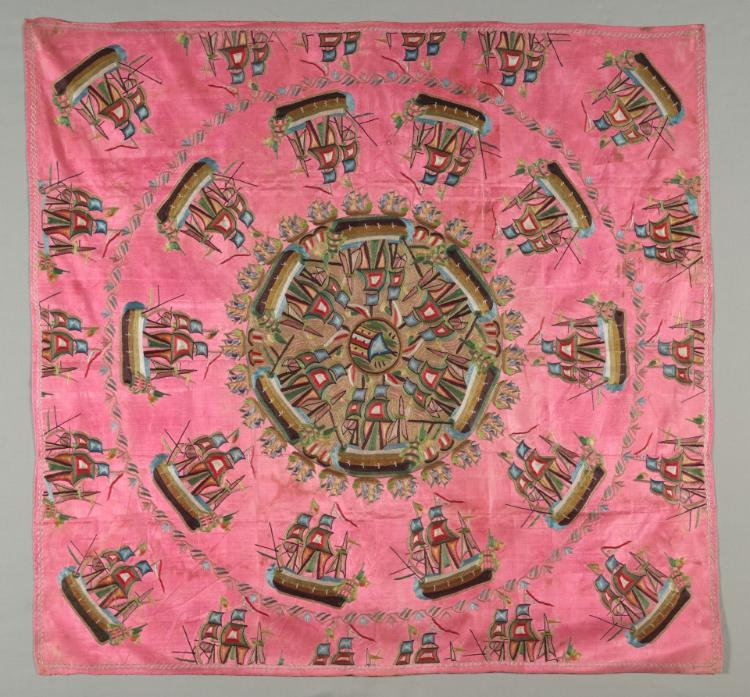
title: Embroidered Square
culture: Turkey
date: 1700s–1800s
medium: embroidery, silk and metallic threads, on silk tabby ground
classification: Embroidery